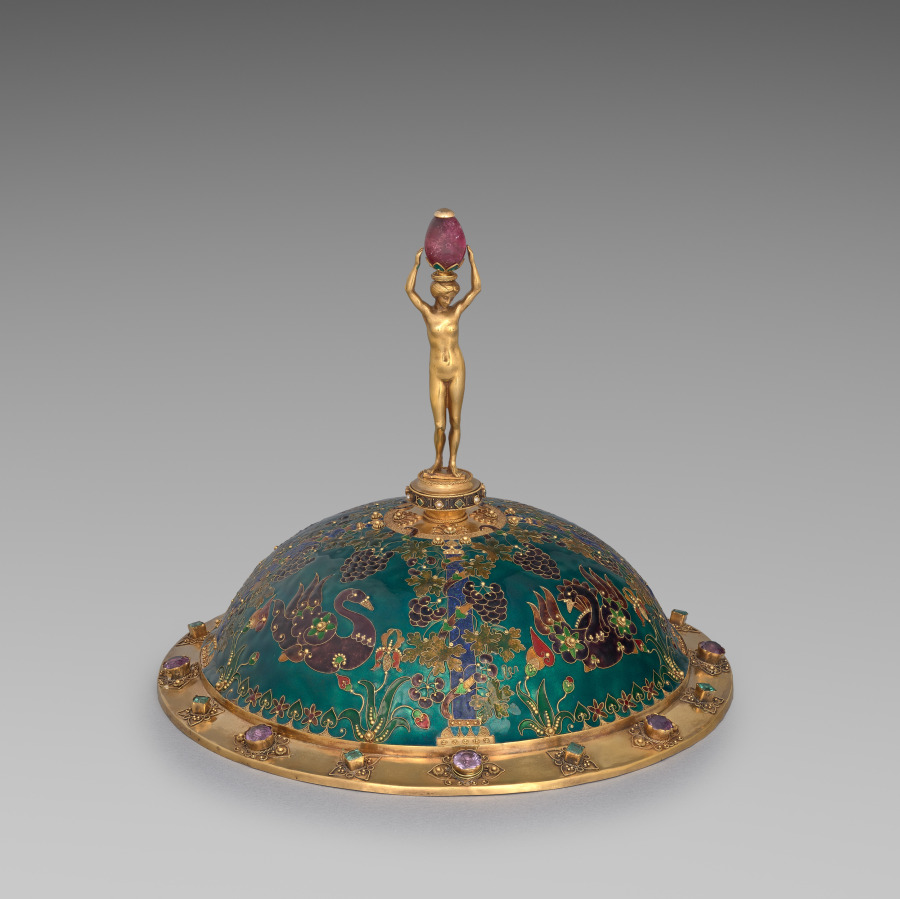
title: Cover for a Cup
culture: France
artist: Armand Point (French, 1861–1932)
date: c. 1897–99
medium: amethyst, silver-gilt, cloisonné enamel, aquamarine, rubies, malachite, lapis lazuli, pearls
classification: Metalwork